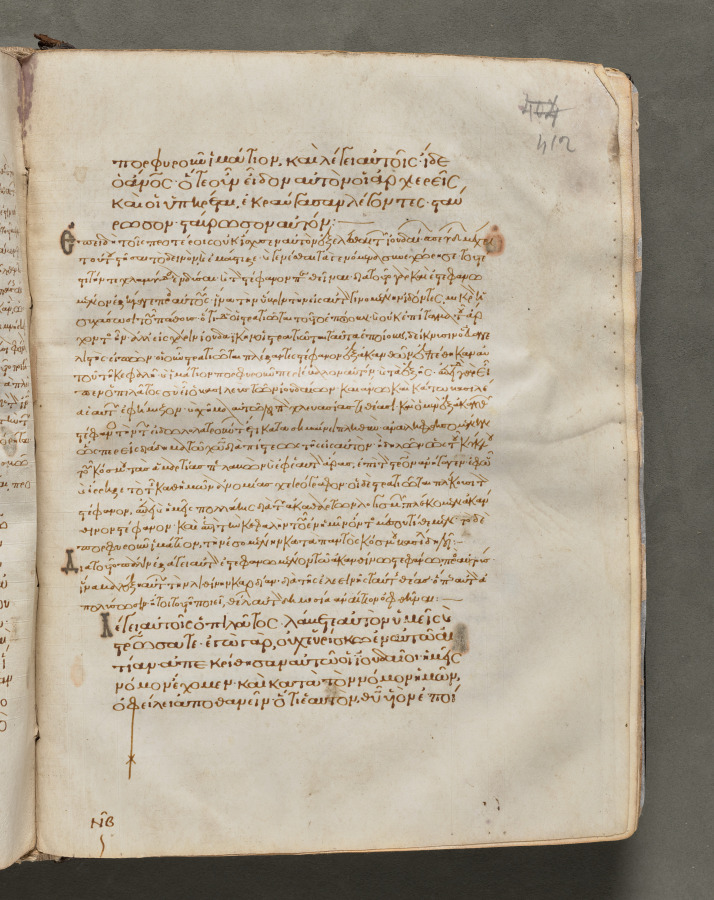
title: Text, folio 412 (recto), from a Gospel Book with Commentaries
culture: Byzantium, Constantinople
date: c. 1000–1100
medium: ink, tempera, and gold on vellum; leather binding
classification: Bound Volume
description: Each of the four gospels in this book opens on a page with brilliantly illuminated borders depicting the author of the text as well as birds—principally peacocks, symbols of the immortality of the soul—and fountains, representing the fountain of life and the salvation of the soul. This volume consists of 428 leaves with texts in Greek. Its level of sophistication suggests that it was probably written and decorated in a monastery in Constantinople.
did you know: Gospel books were carried in procession through Byzantine churches.